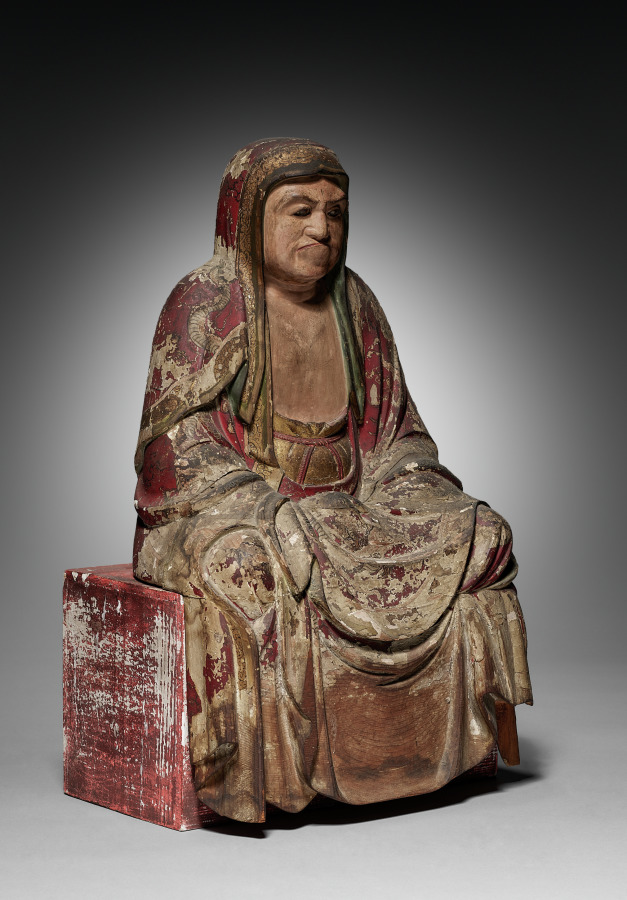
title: Rakan (Arhat) ?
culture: Japan, Edo period (1615–1868)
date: early to mid-1800s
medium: wood, gesso, pigment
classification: Wood